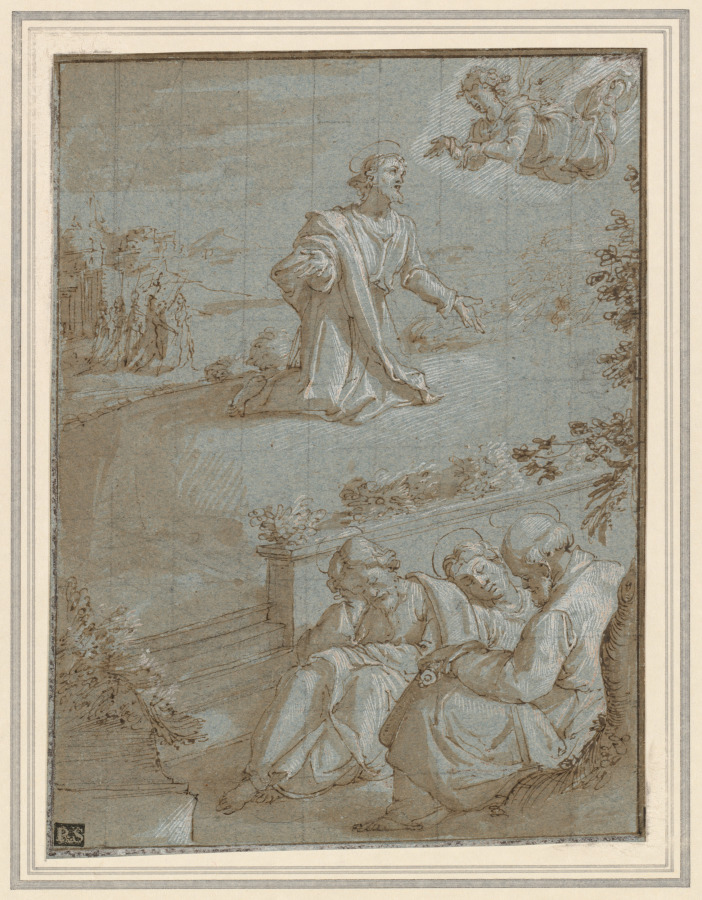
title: The Agony in the Garden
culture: Italy, 16th century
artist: Santi di Tito (Italian, 1536–1602)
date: c. 1591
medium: Pen and brown ink, brown wash, heightened with white gouache with traces of black chalk on hillside above stairs, squared in black chalk, on blue paper; within brown ink framing lines. Lined with cream wove paper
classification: Drawing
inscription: Stamped in lower left corner, in black ink: PS [Lugt 2112]